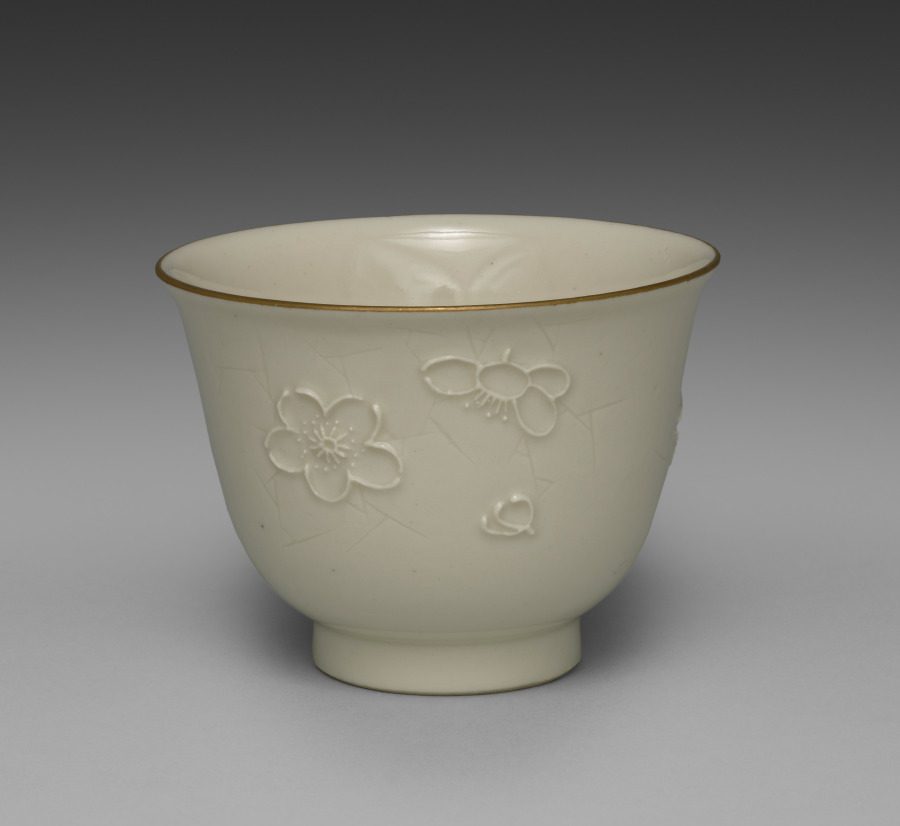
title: Drinking Cup from Dining Set with Plum Blossoms and Cracked-Ice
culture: Japan, Meiji period (1868–1912)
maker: Seifū Yohei II (Japanese, 1844–1878)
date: c. 1875–78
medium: Porcelain with molded designs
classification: Ceramic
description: Each item in this set has a delicate low-relief design of flowering plum branches over scattered, intersecting lines meant to resemble the cracked-ice surface of a frozen body of water and is signed on the base in gold pigment. While Yohei II produced many fine works in underglaze blue, like those produced by Kiyomizu Shichibei, he also made works in quite different styles later in his career, from the early 1870 s. In 1873, he was appointed purveyor to the Industrial Center of Kyoto Prefecture, a designation associated with Kyoto’s efforts to reach an international market through the port of Kobe; and from 1875 until his death, he was involved in national-level projects to present Japanese ceramics across the world. It was during this period that Yohei III was apprenticed to Yohei II, and it has been suggested that this set may in fact be an early example of Yohei III’s work, which he signed with his teacher’s name. Decorated with flowers resembling Japanese textile motifs, the set calls to mind the design of Yohei II’s pair of vases with plum blossoms in the Victoria and Albert Museum. Here, the elaborate trees created for a formal public exhibition setting have been translated into the approachable blossoms of the genteel domestic environment. While the designs are consistent across the pieces, each raised flower petal and pistil and each incised line in the ice was done by hand, so the cups, bowls, and dishes are similar yet unique. The bottoms of two boxes once identified the set’s owner, but the information has been deliberately obscured with black ink. However, inscriptions still visible appear to indicate two occasions, once at the end of July 1886 , and once again in June 1916 , when parts of the set were requested from Hokura in Niigata Prefecture. The location corresponds to a neighborhood in the present-day city of Jōetsu. The surname Tsuji 辻 also appears on a paper tag affixed to one of the box cloths. Future research may possibly reveal more about their provenance. A vase by Yohei III in a private collection combines the formal grandeur of the Yohei II vases in the Victoria and Albert Museum with the gentler design of this dining set, placing flowering plum trees against soft, scalloped-edge clouds resembling those in golden screens.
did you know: The dining wares have a creamy white coloration that the four boxes containing them identify as Korean in style.